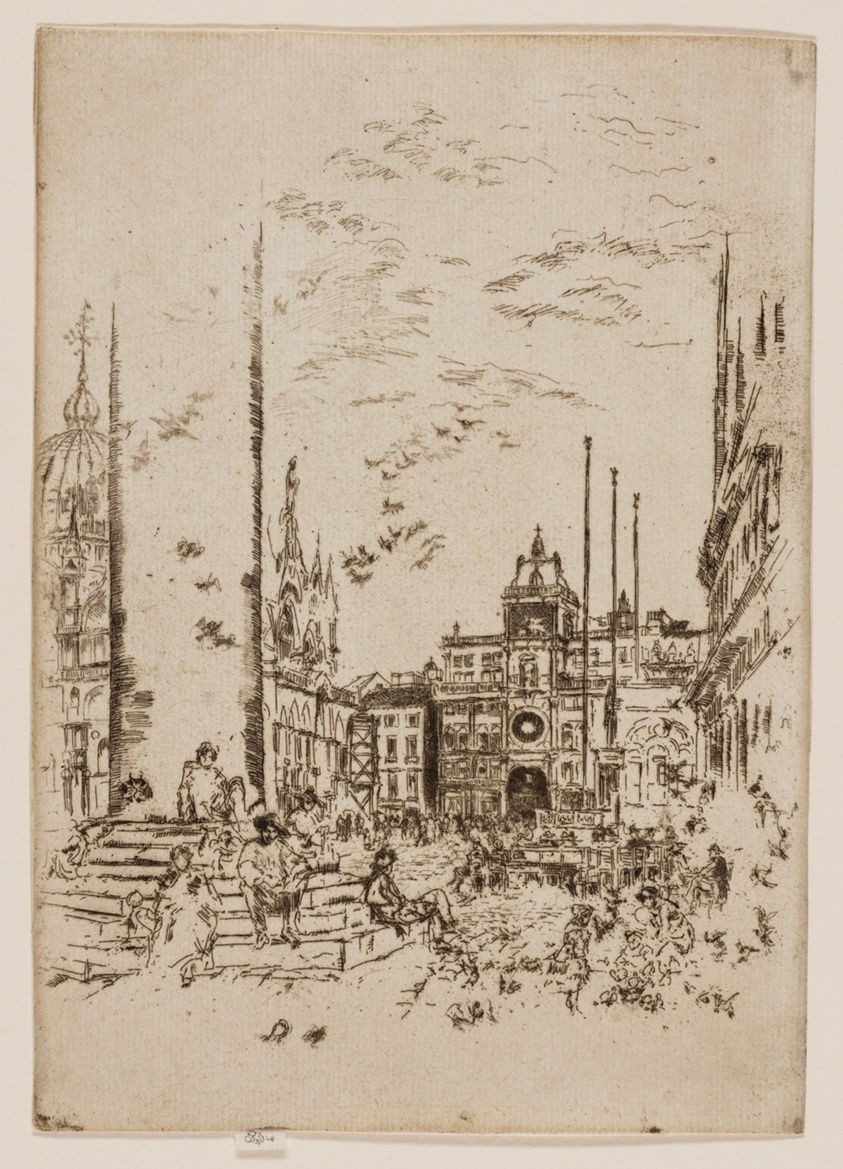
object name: Print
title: The Piazzetta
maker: James McNeill Whistler (American, 1834-1903)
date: 1879/80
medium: Etching and drypoint with foul biting in black ink on light green laid paper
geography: United States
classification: etching; foul biting; print; prints and drawing; paper; drypoint